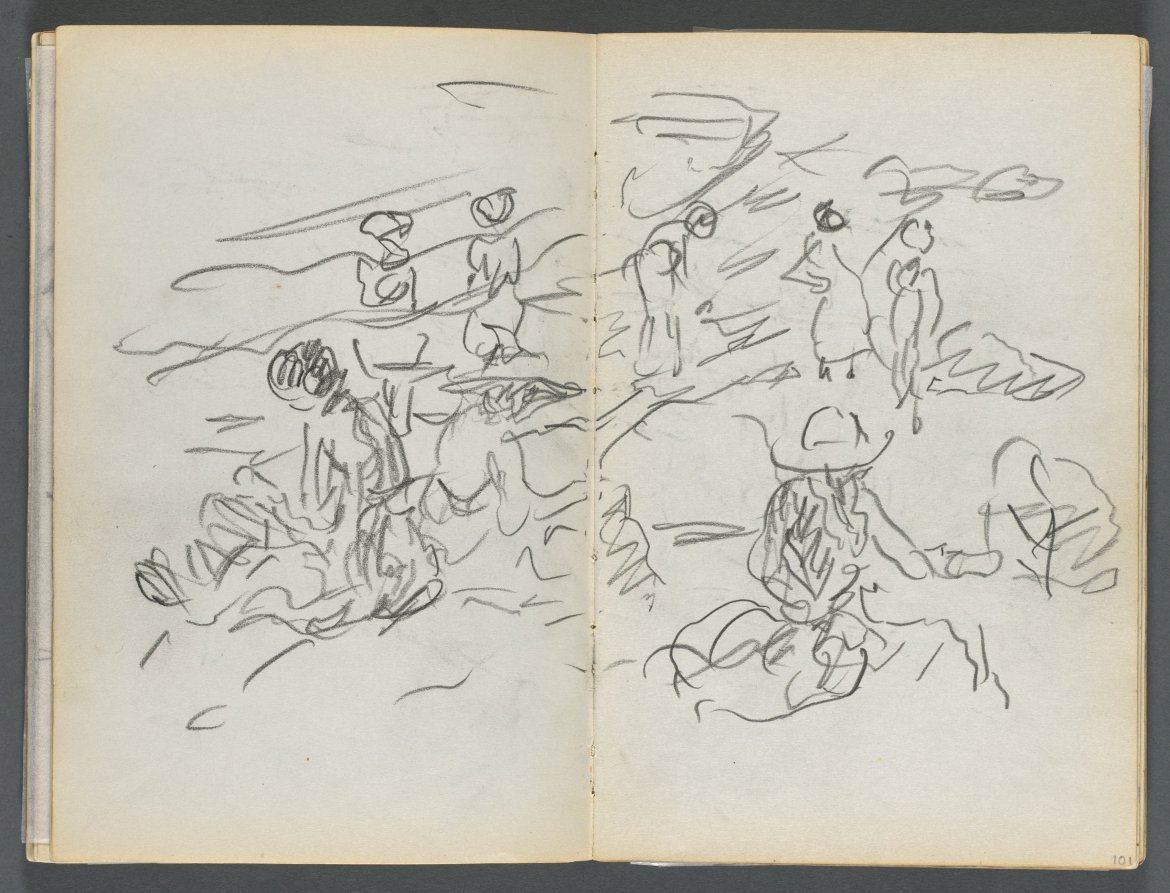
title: Sketchbook, The Dells, N° 127, page 100 & 101: Figures on a Beach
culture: America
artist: Maurice Prendergast (American, born Newfoundland [now Canada], 1858–1924)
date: c. 1919–1921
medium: graphite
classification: Bound Volume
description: This sketchbook contains 59 pages of graphite drawings and 16 watercolors made at various locations on Cape Ann, Massachusetts.